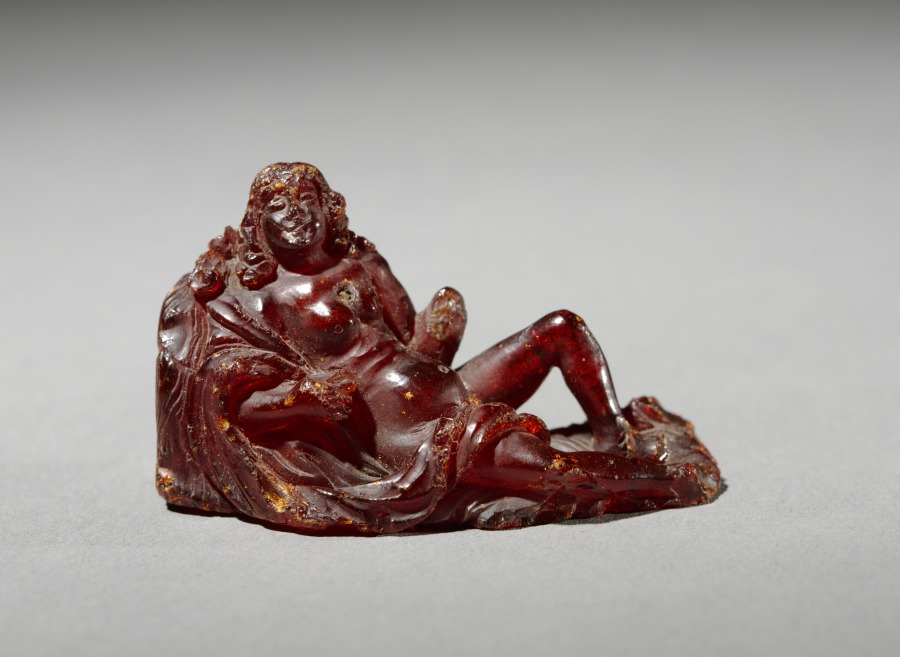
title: Statuette of a Reclining Woman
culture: Greek, Hellenistic, or Roman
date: c. 100 BCE–100 CE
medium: amber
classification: Sculpture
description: This tiny statuette is made from amber, or fossilized tree sap. A nude woman reclines against a rocky feature, surrounded by sumptuous piles of fabric which wind around her right arm and leg. Her gaze is upturned, loose hair framing her face. There are cracks throughout the figure, and she is missing both hands and some of her face. She may represent a nymph or maenad.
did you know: Amber can range in color from bright yellow to deep red depending on its origins.